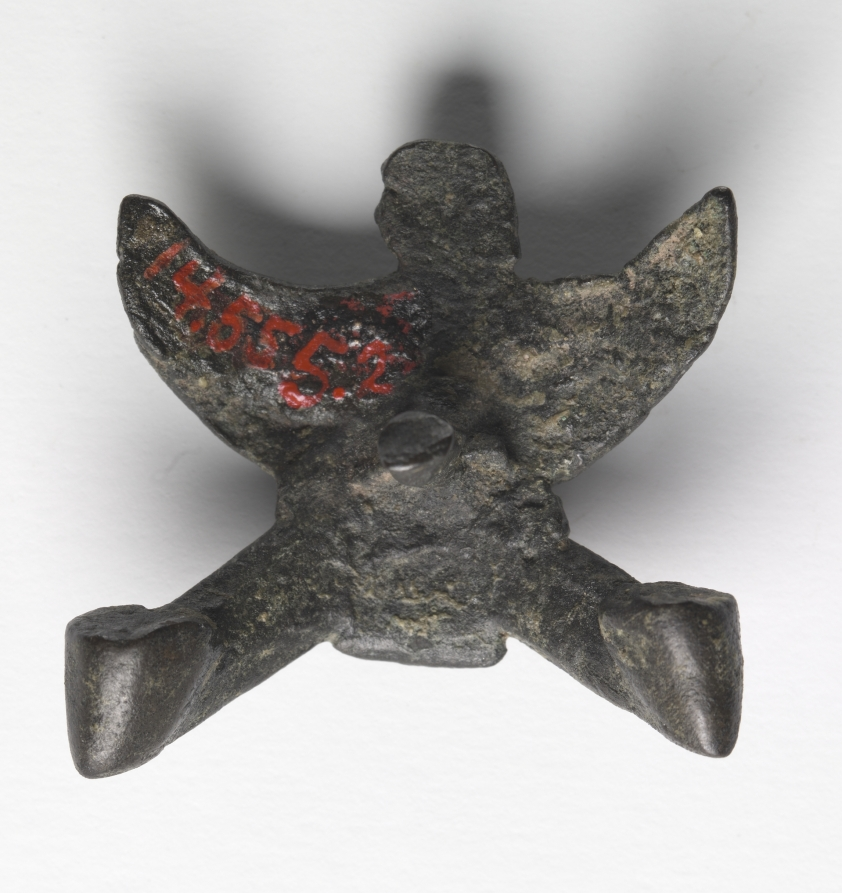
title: Bronze mount from a "Shawabty Bundle": Crossed Arms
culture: Egypt, Thebes, Wadi Qubbanet el-Qirud, New Kingdom (1540–1069 BCE), Dynasties 18–19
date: c. 1336–1256 BCE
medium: bronze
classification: Funerary Equipment